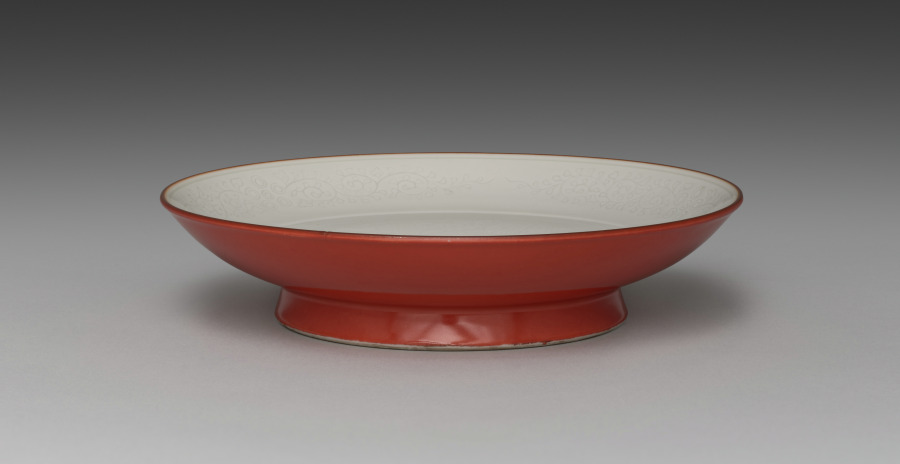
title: Dish with Carp in Waves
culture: Japan, Meiji period (1868–1912)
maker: Seifū Yohei III (Japanese, 1851–1914)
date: 1893–1914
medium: Porcelain with incised designs, iron oxide, and red glaze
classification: Ceramic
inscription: 清風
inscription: 清風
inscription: 清風盧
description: The exterior of this low, wide dish with flared foot is covered with a red coral glaze. Its interior is white with incised designs, and the rim is decorated with brown iron oxide. The primary design occupies the flat bottom of the bowl and is bound within a single band. It is of a carp swimming vigorously against roiling waves with frothy crests moving in multiple directions; the water just above the fish’s head is beginning to form a whirlpool. A closer look at the fish’s face reveals that it somewhat resembles that of a dragon. It is possible that the motif is meant to be a carp who jumps over the waterfall and transforms into a dragon, who flies into the sky. The iconography symbolizes the transformative experience of striving to one’s utmost and achieving the impossible against tough odds. Originating in China, the narrative’s visual representation as well as its meaning crossed the ocean to Japan, where it often appeared on items gifted to those celebrating pivotal successes in life, such as obtaining elevated status in one’s work or graduating from an academic program.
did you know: The inside walls of the bowl are decorated with three abstract flowers, each represented with five circles ringing a central circle, from which leafy tendrils stretch in both directions .